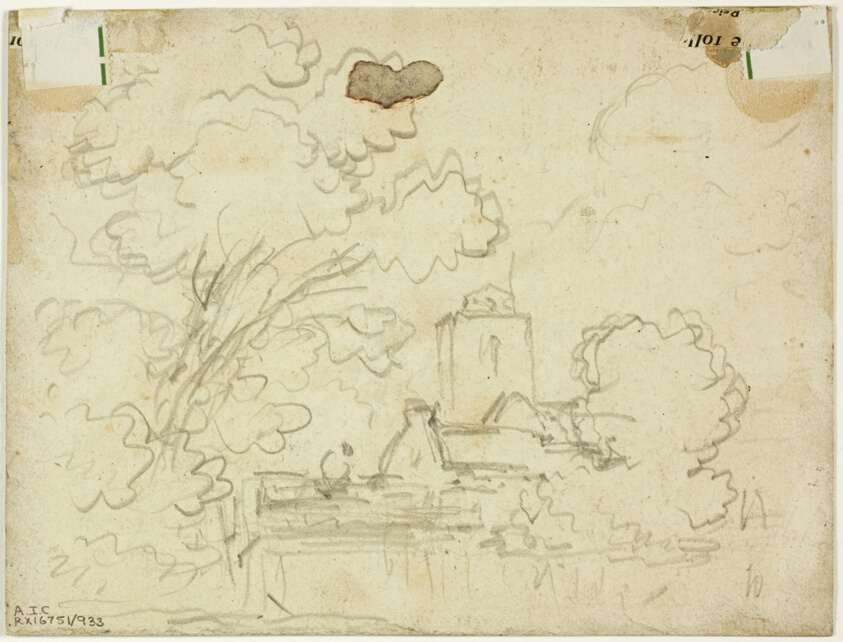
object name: Drawing and Watercolor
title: Farmhouse (recto); Landscape with Church Tower (verso)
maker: James "Drunken" Roberstson; English, active 1815-1836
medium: Pen and brown ink with brush and watercolor, over graphite, on ivory laid paper (recto), and graphite on ivory wove card (verso), laid down on ivory wove card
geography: England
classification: watercolor; drawings (visual works); prints and drawing